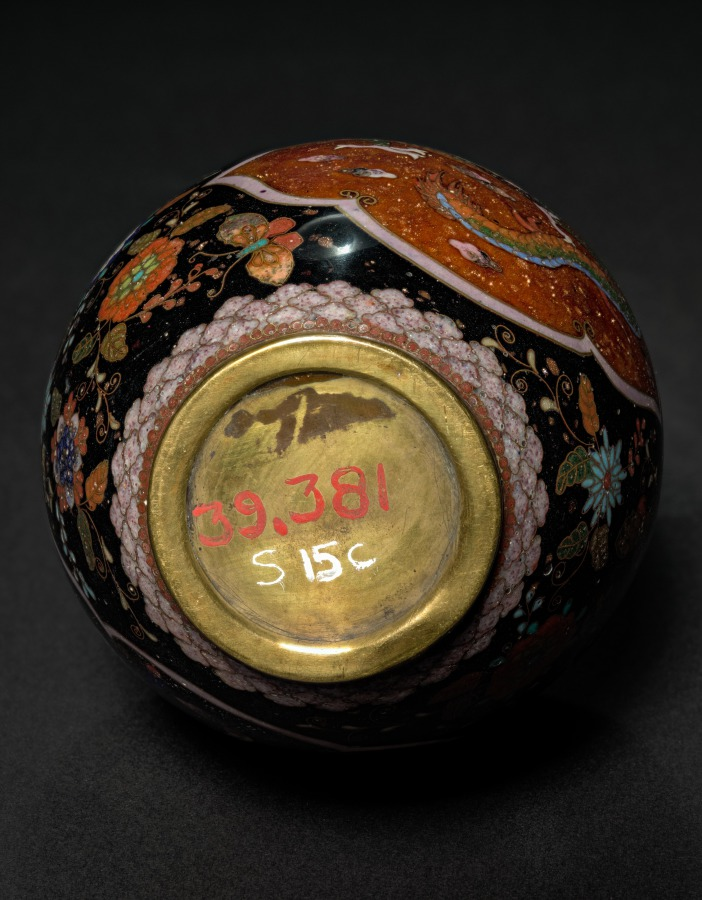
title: Ginger Jar with Phoenix and Dragon (base)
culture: Japan, Meiji period (1868–1912) to Taishō period (1912–26)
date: early 1900s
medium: cloisonne enamel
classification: Enamel